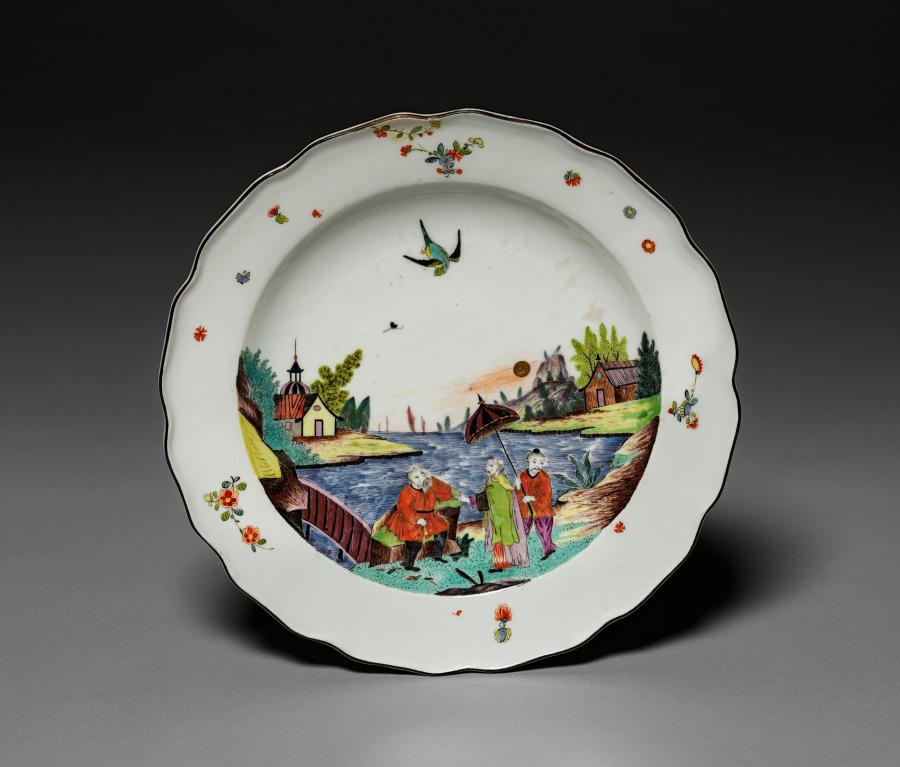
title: Plate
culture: Germany, Meissen, 18th century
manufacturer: Meissen Porcelain Factory (German, est. c. 1710)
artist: manner of Adam Friedrich von Lowenfinck (German, 1714–1754)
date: c. 1740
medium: porcelain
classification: Ceramic